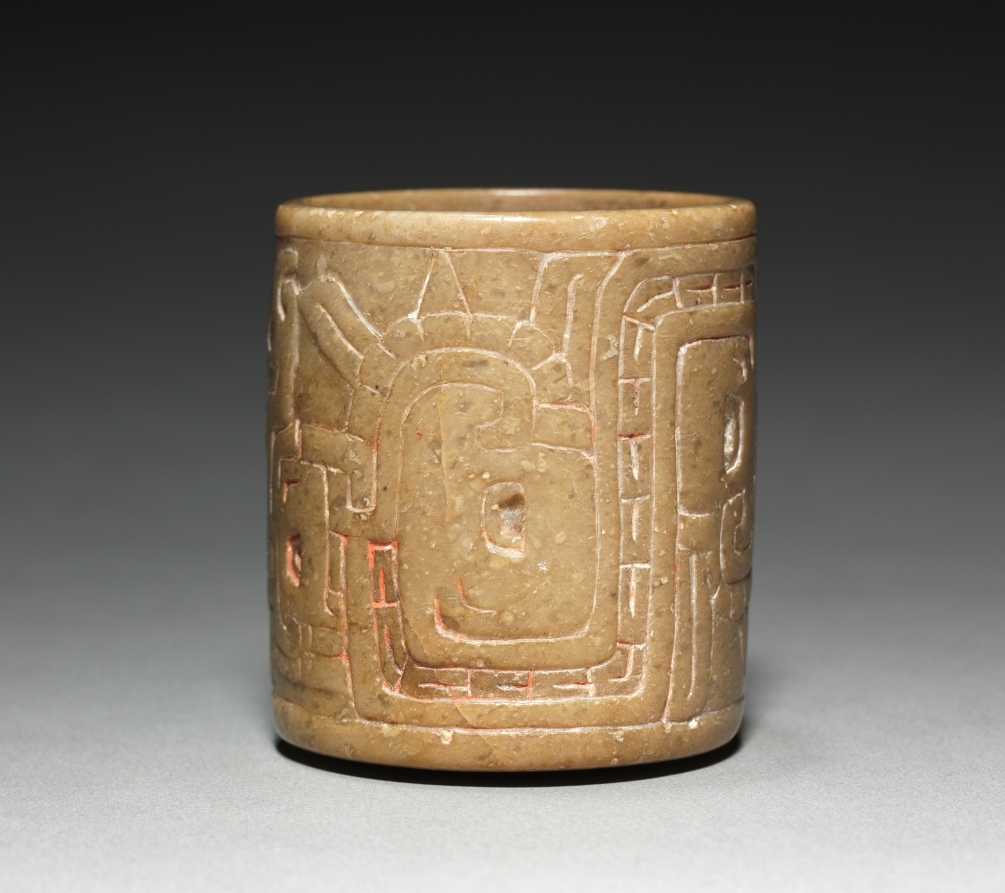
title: Cup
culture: Peru, North Coast, Cupisnique style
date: c. 900–600 BCE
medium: steatite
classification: Stone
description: While Chavín held sway in the highlands, coastal artists produced many objects in non-Chavín styles. Such is the case with these small, finely carved, stone containers, which were part of north coast ritual paraphernalia, though their specific use is unclear. Both bear complex designs based on fanged heads in profile that lack lower jaws.